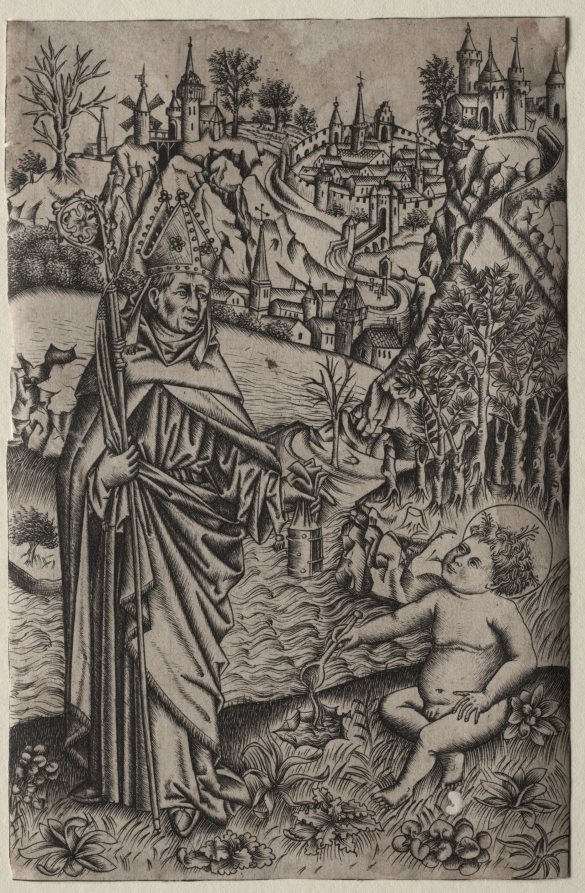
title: St. Augustine and the Child on the Seashore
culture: Germany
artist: Master of the Nuremberg Passion (German, active mid-1400s)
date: c. 1465–1469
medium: engraving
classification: Print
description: The Master of the Nuremberg Passion—named for a set of prints in the Germanisches Nationalmuseum, Nuremberg—was probably a contemporary of the Master E. S. and ranks among the best engravers of his period. He made some 19 engravings, and Saint Augustine and the Child on the Seashore, the most mature of his works, only survives in this unique example. Even the finest lines printed clearly in this early, rich impression.